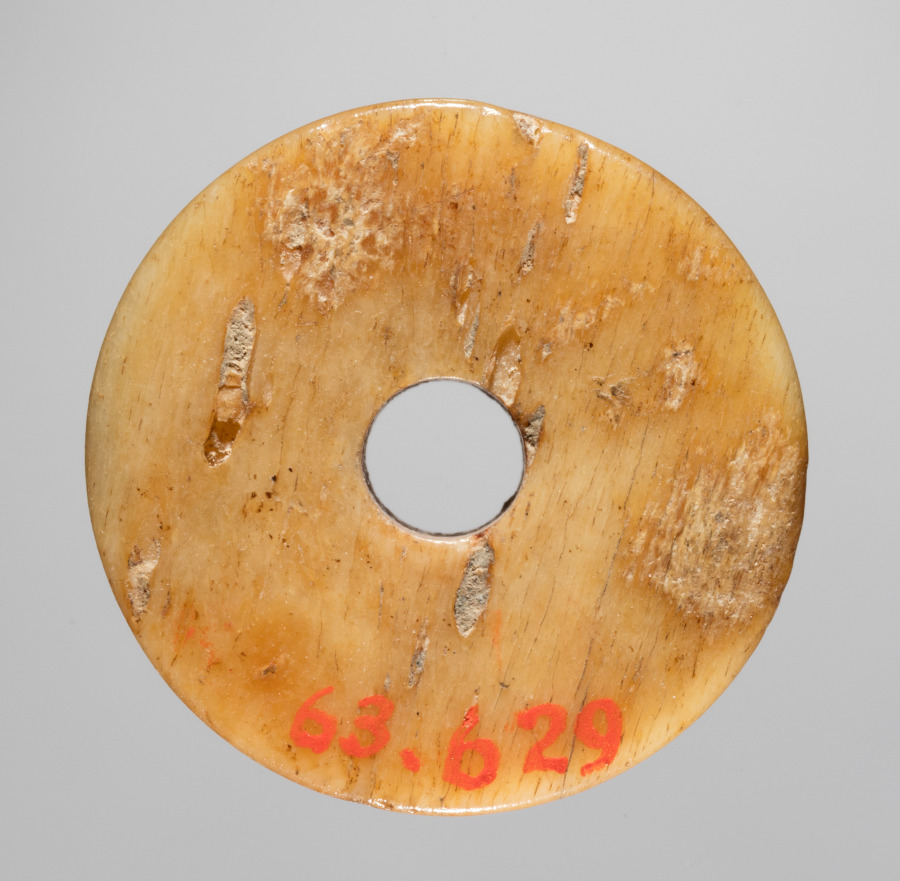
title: Spindle Whorl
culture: Iran, early Islamic period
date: 700s - 900s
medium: bone, incised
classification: Spindle Whorl